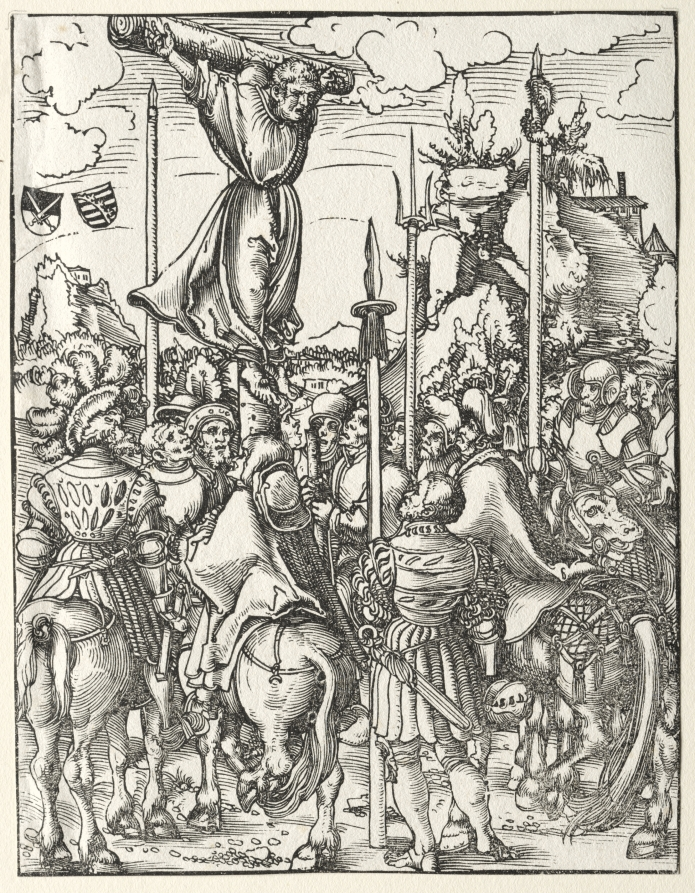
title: Martyrdom of St. Philip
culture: Germany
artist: Lucas Cranach (German, 1472–1553)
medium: woodcut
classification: Print